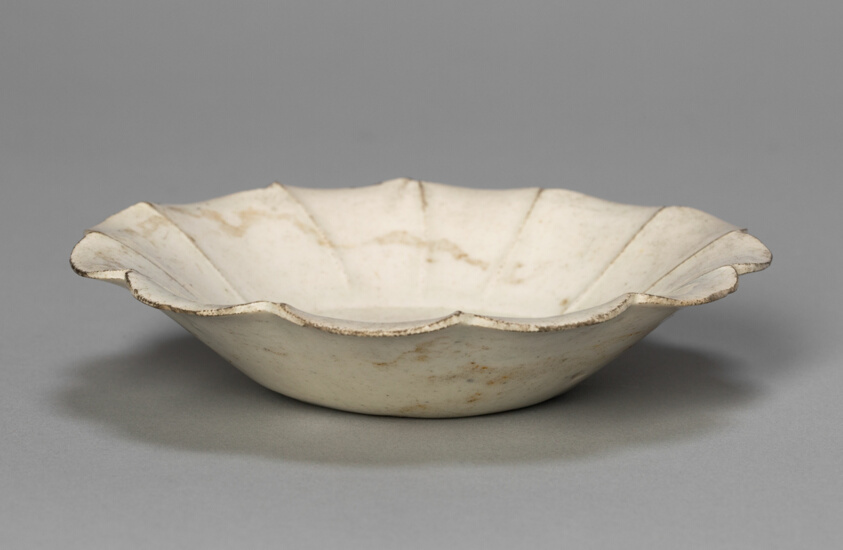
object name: Vessel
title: Saucer-Shaped Dish with Fluted Rim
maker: China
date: Song dynasty (960–1279)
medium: Ding ware; stoneware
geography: China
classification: ceramics; asian art